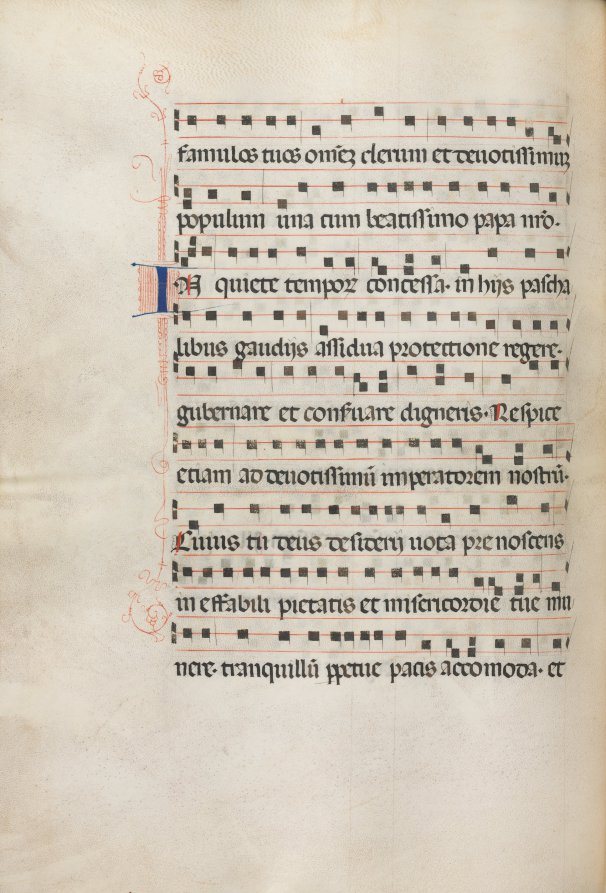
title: Missale: Fol. 157v: Music for "Exultet"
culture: Italy, Perugia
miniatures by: Bartolommeo Caporali (Italian, c. 1420–1503)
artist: assisted by Giapeco Caporali (Italian, d. 1478)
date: 1469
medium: ink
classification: Bound Volume